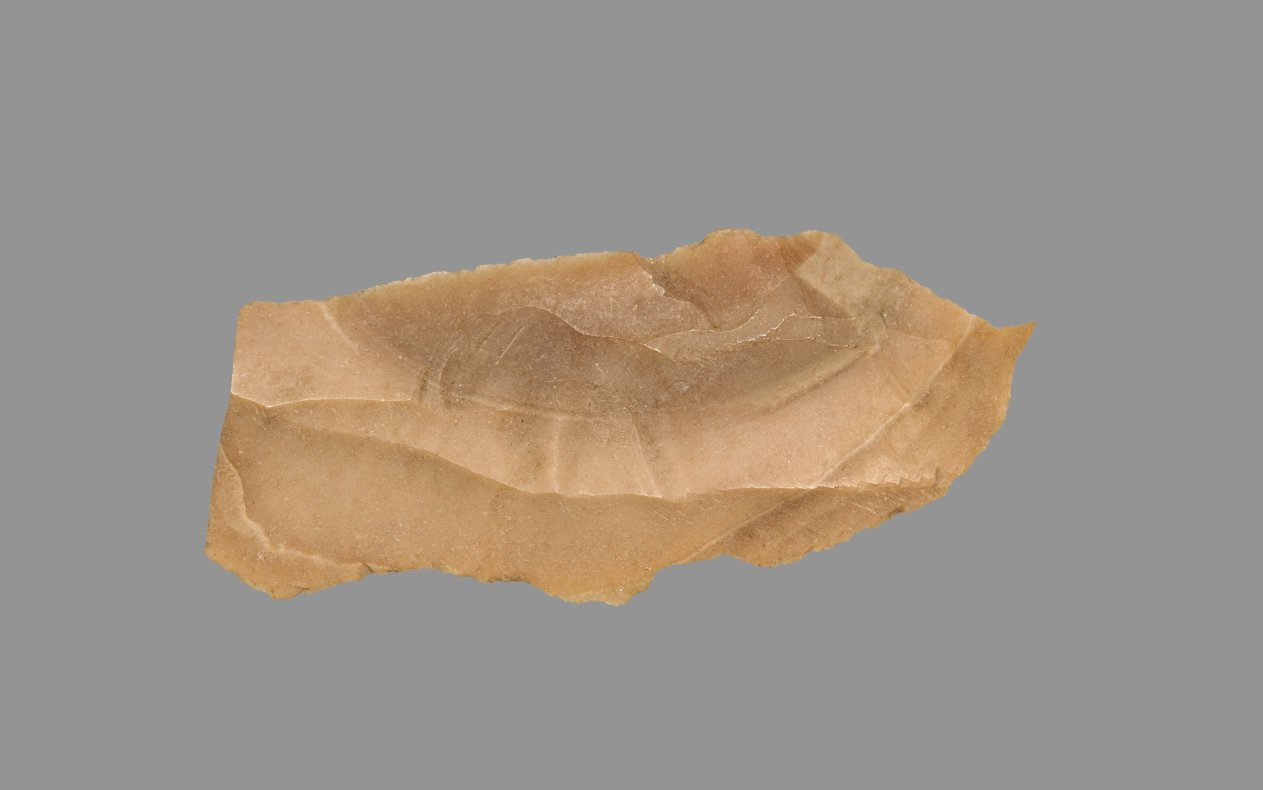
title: Sickle Blade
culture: Egypt, Middle Kingdom (2040–1648 BCE), Dynasty 12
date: 1980–1801 BCE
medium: flint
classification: Implements